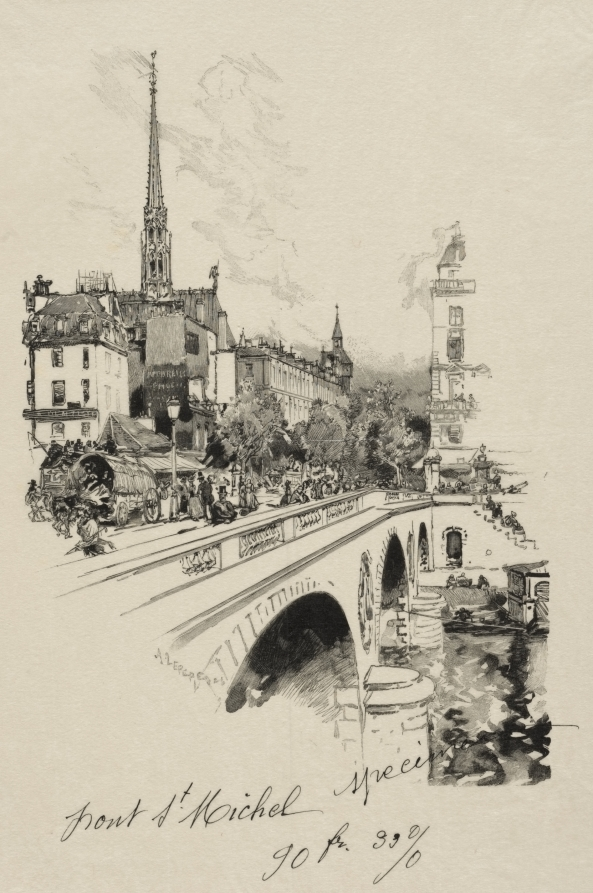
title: Le Pont Saint-Michel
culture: France, 19th-20th century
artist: Auguste Louis Lepère (French, 1849–1918)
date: 1890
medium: wood engraving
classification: Print